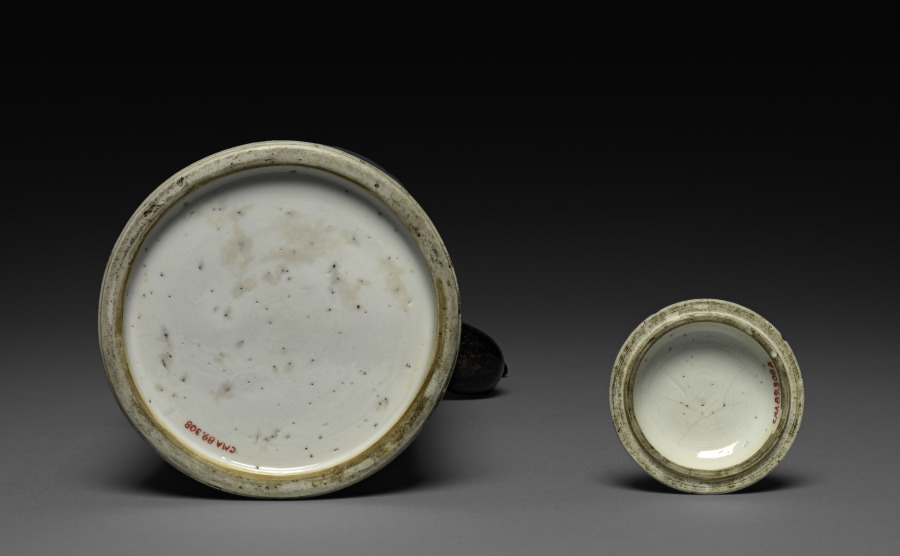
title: Cylindrical Ewer with Dragons Pursuing Flaming Jewel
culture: China, Jiangxi province, Jingdezhen kilns, Qing dynasty (1644-1911), Kangxi reign (1662-1722)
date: 1662–1722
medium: porcelain with powder blue glaze painted with gold decoration and supplied with metal fittings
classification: Ceramic